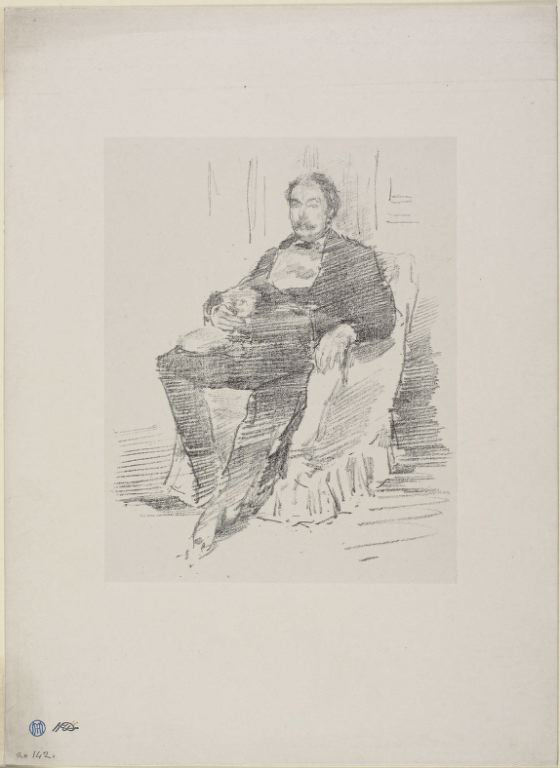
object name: Print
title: Portrait of Dr. Whistler, No. 2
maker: James McNeill Whistler (American, 1834-1903)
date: 1894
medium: Transfer lithograph in black ink on grayish ivory China paper laid down on ivory wove paper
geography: United States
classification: transfer lithograph; lithograph; print; prints and drawing; paper